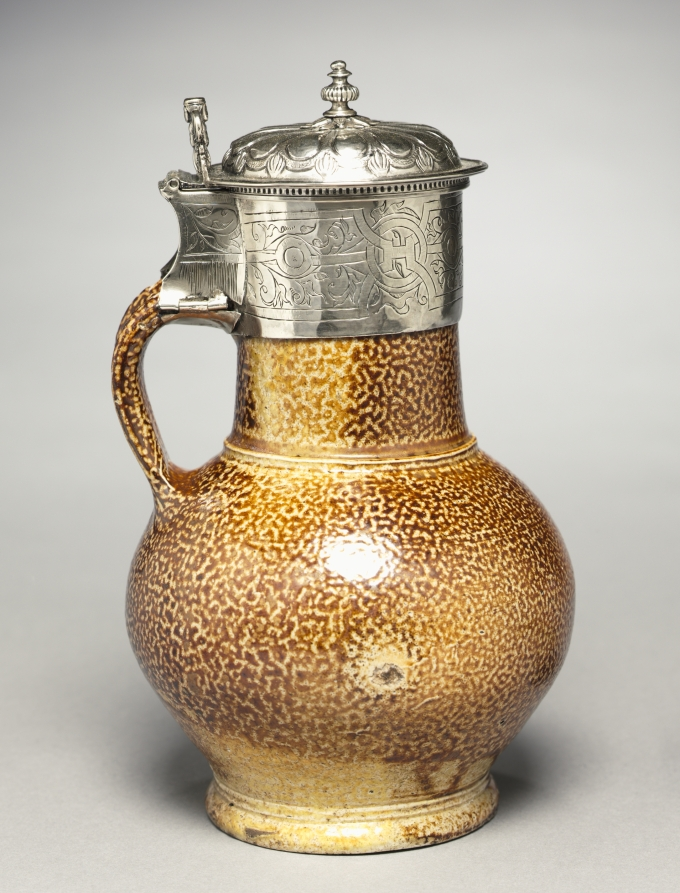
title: Covered Jug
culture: Germany (jug) and England (mounts), 16th century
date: c. 1570–1573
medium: Tigerware, silver mount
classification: Ceramic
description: German Stoneware The production and export of German stoneware reached its peak in the late 1500s. Prized for its durability and stone-like appearance, German stoneware became one of the most widely traded forms of pottery, even finding popularity in early America. The distinctive pebbly glass surface, resembling an orange peel, was achieved by introducing salt into the hot kiln during the firing process. This glaze gave clear definition to the coats of arms or other emblems that often formed the surface decoration on large works, usually jugs.